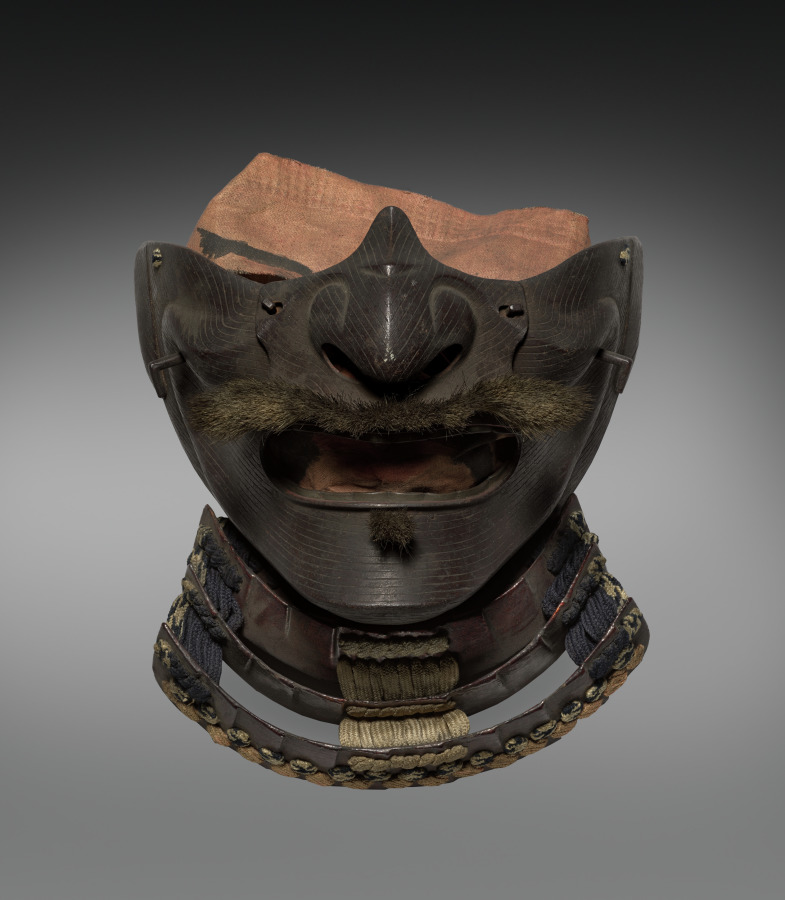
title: Half-mask (Ho’o-ate) with Neck Guard (Nodowa)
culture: Japan, Edo period (1615–1868)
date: 1600s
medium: Iron, lacquer, textile (silk)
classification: Arms and Armor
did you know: There is a painted face inside the mask.